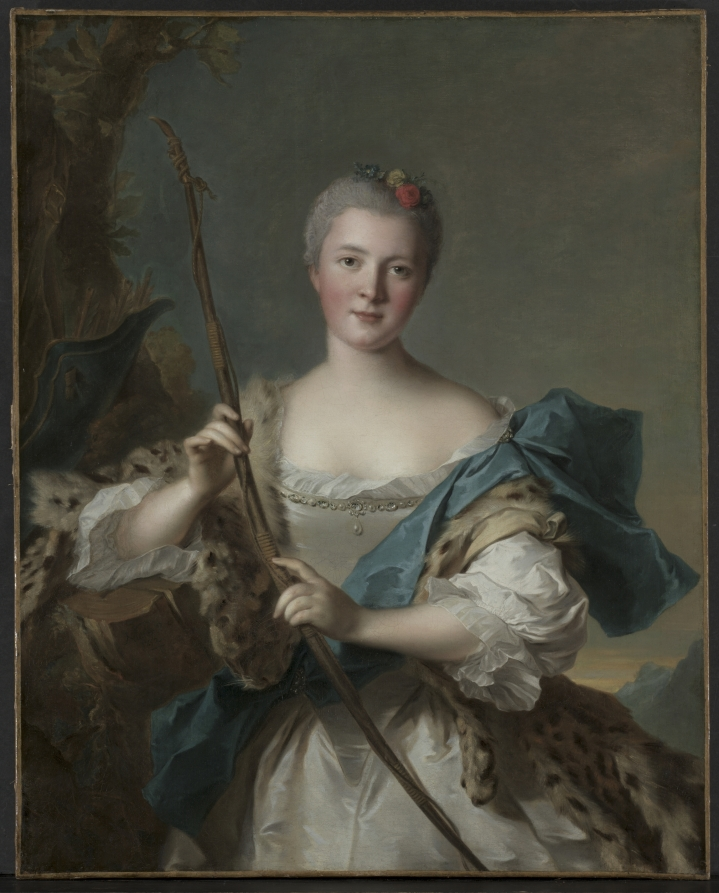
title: Portrait of a Woman as Diana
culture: France, 18th century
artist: Jean-Marc Nattier (French, 1685–1766)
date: 1752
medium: oil on canvas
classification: Painting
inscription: signed lower left: Nattier P.x. / 1752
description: For many years, this sitter was identified as Madame de Pompadour, but she bears little resemblance to this pivotal figure in French art and politics of the mid 1700s. Nattier specialized in portraits of women in mythological guises—in this case, the bow, quiver, and leopard skin, all attributes of Diana, goddess of the hunt.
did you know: The sitter was once thought to be King Louis XV’s daughter Henriette or his mistress Madame de Pompadour. Today, her identity is unknown.